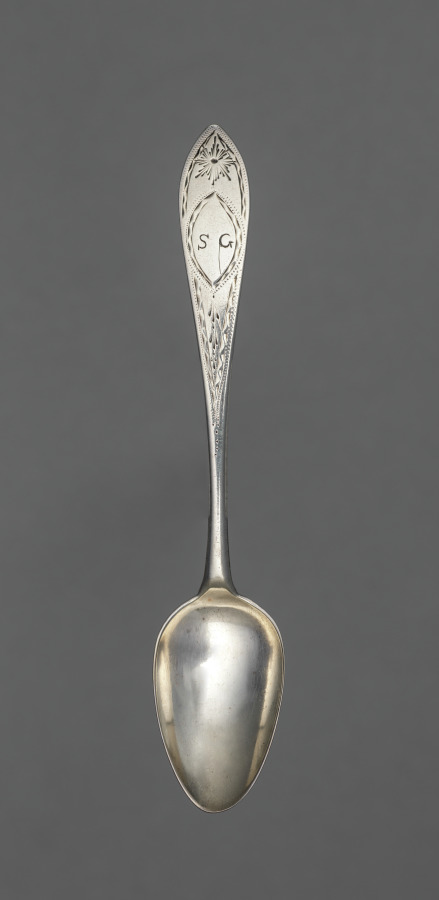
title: Teaspoon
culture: America, Massachusetts, Boston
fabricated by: Rufus Farnam (American, 1771-)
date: c. 1790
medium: silver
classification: Silver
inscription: engraved "SG" in block letters within reserve on top of handle end.